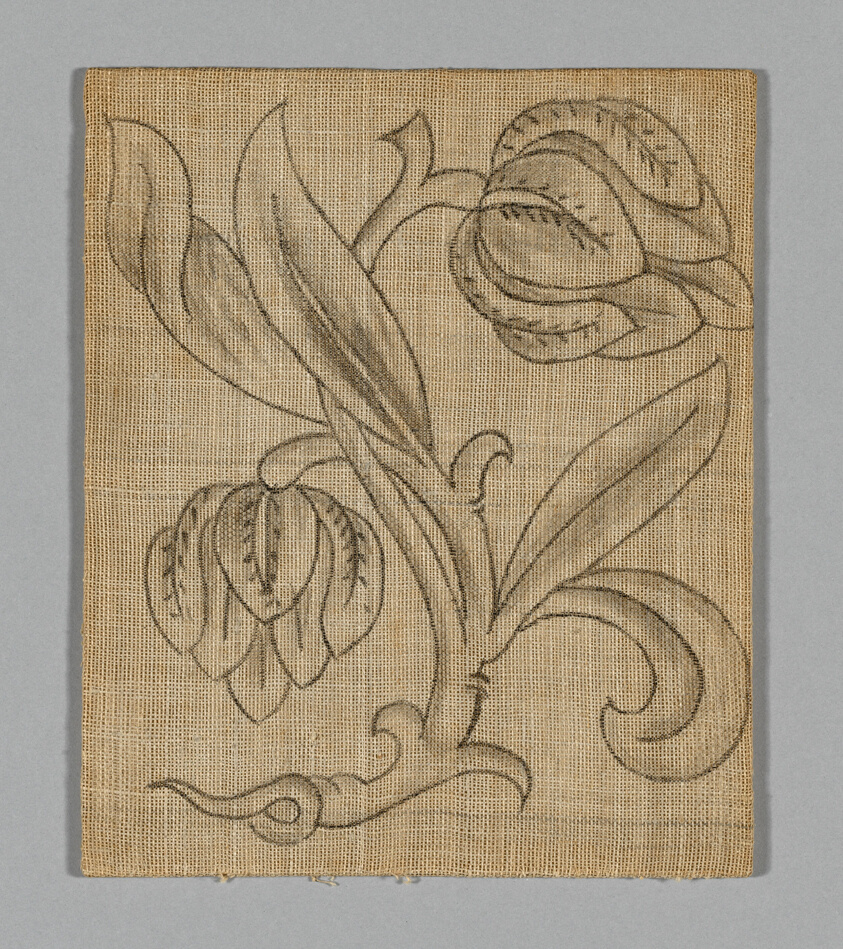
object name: Textile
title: Slip (Unfinished)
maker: England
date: 17th century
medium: Linen, plain weave; drawing in graphite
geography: England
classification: textile; patterns (guides); accessories (object genre); needlework (visual works)